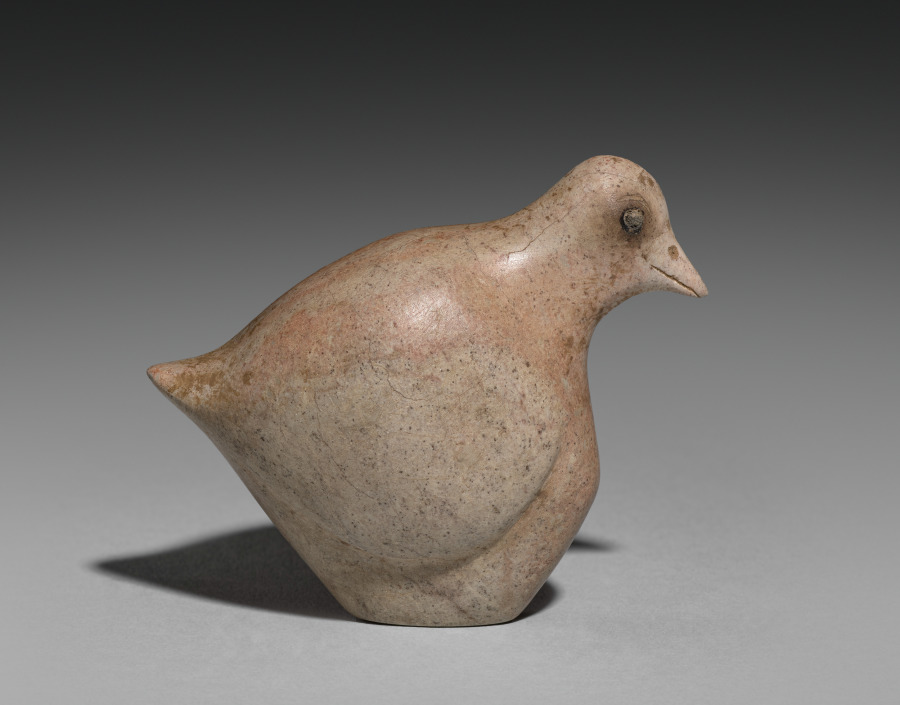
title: Nesting Quail Stamp Seal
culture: Iran, Lake Van region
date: 4000–3000 BCE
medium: dickite stone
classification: Sculpture